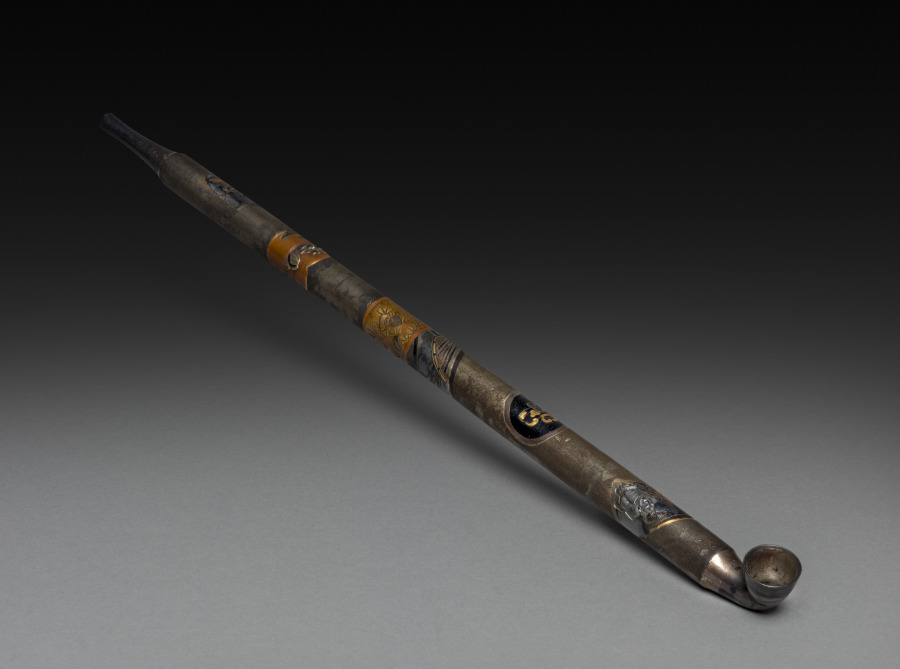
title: Tobacco Pipe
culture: Japan, Edo period (1615–1868)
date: 1700s to mid-1800s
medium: metal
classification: Miscellaneous